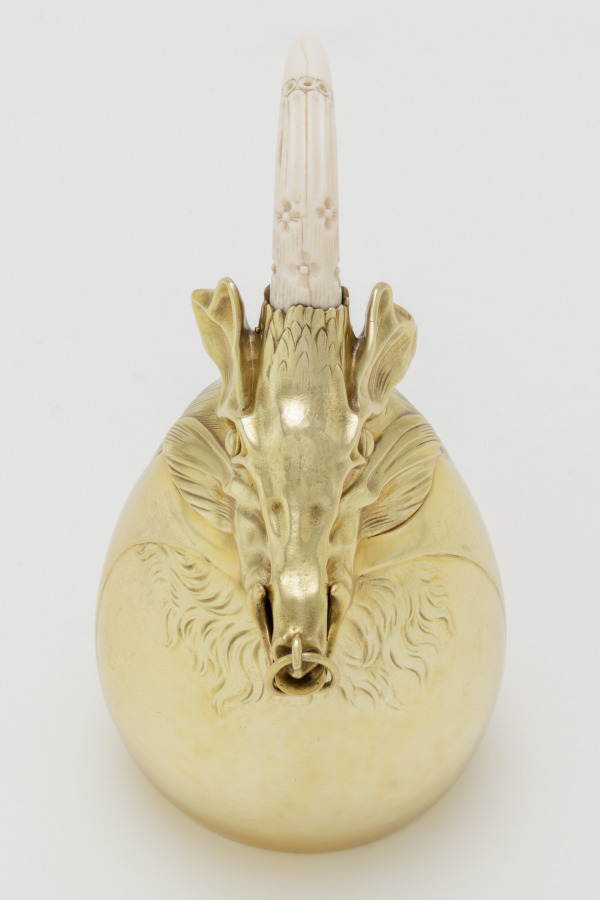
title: Tea Pot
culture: France, Paris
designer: Carlo Bugatti (Italian, 1856–1940)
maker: Adrien-Aurélien Hebrard (French, 1866–1937)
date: c. 1907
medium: Gilt silver and ivory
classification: Silver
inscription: Made by A. A. Hebrard Firm, Paris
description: This tea and coffee service, salver, and table, together with some now missing cups, were all designed by Carlo Bugatti as an ensemble and presented at the 1902 exposition devoted to decorative arts in Turin, Italy. The set was probably acquired from Bugatti's 1907 exhibition at the Galerie Hébrard in Paris by a wealthy South African widow, Anna Blake, who was living there at the time. Some of the animal and insect motifs suggest mythical beasts or the fossils of prehistoric animals. When Mrs. Blake returned to Cape Town, she took these and other pieces designed by Bugatti with her, and they remained in South Africa throughout her lifetime.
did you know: This tea pot is part of a tea and coffee service designed by Carlo Bugatti.